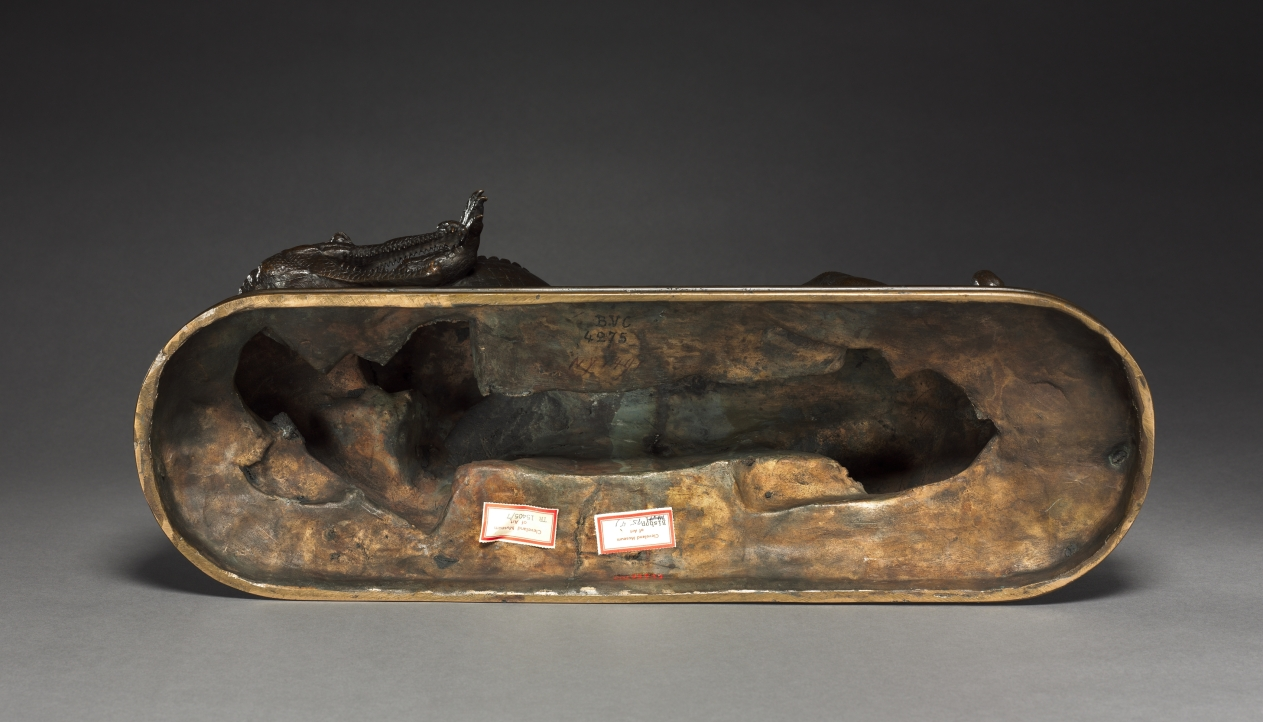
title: Tiger Devouring a Gavial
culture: France, 19th century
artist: Antoine-Louis Barye (French, 1796–1875)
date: 1831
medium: bronze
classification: Sculpture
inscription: Signed: "BARYE"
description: A large reptile of southern Asia, the gavial is related to and resembles a crocodile.